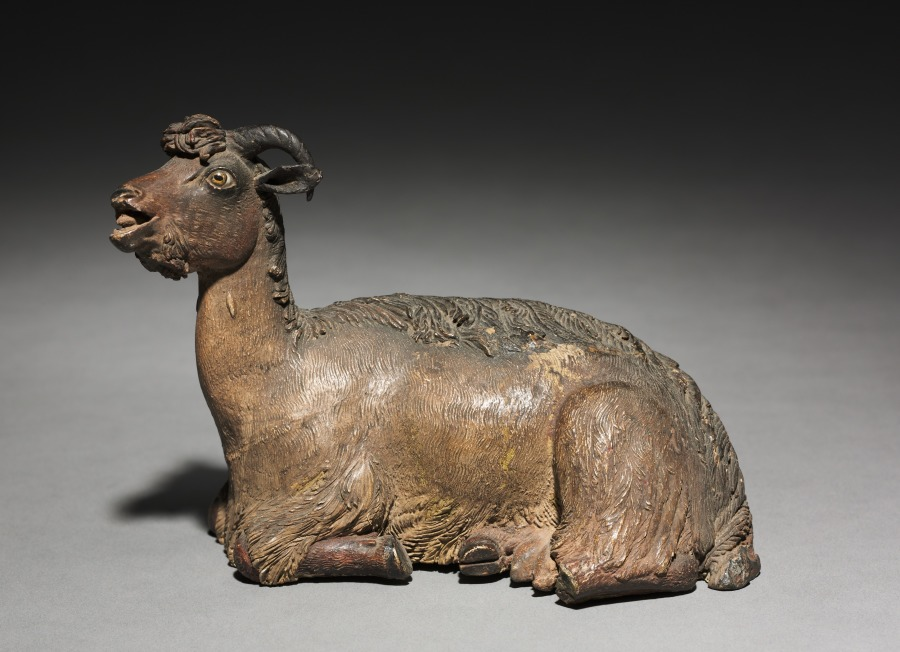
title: Figure from a Crèche: Sitting Ram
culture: Italy, Naples, late 18th-early 19th century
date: 1780–1830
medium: painted terracotta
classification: Sculpture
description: The practice of creating scenes of the Nativity for the home dates from the early 1700s in Italy, where people began to set up doll-like figures of about a foot or less in height. The custom was particularly popular in Naples around 1800, where crèche scenes (crèche means cradle, or crib) included many figures, whose heads and hands of painted terracotta, stuffed cloth bodies, and clothing adapted from contemporary local costumes gave them an amazingly realistic character. Representations of the birth of Jesus can be traced to the first few centuries of Christianity. Both living creatures and sculptural depictions of them were used from early times. By the late middle ages it was customary to create life-size figures of wood or stone, naturalistically painted, to represent the characters who participated in the events of Jesus's early life. These sculptures were then arranged in scenes illustrating one or both of the most important of these events, the Adoration of the Shepherds and the Adoration of the Magi-the three kings from the East who came to pay homage to the Christ child. Used in churches, these large figures were especially popular in Italy, Central Europe, Spain, and Portugal. This Object in Focus presentation was organized by Henry Hawley, Curator of Renaissance and Later Decorative Arts and Sculpture.